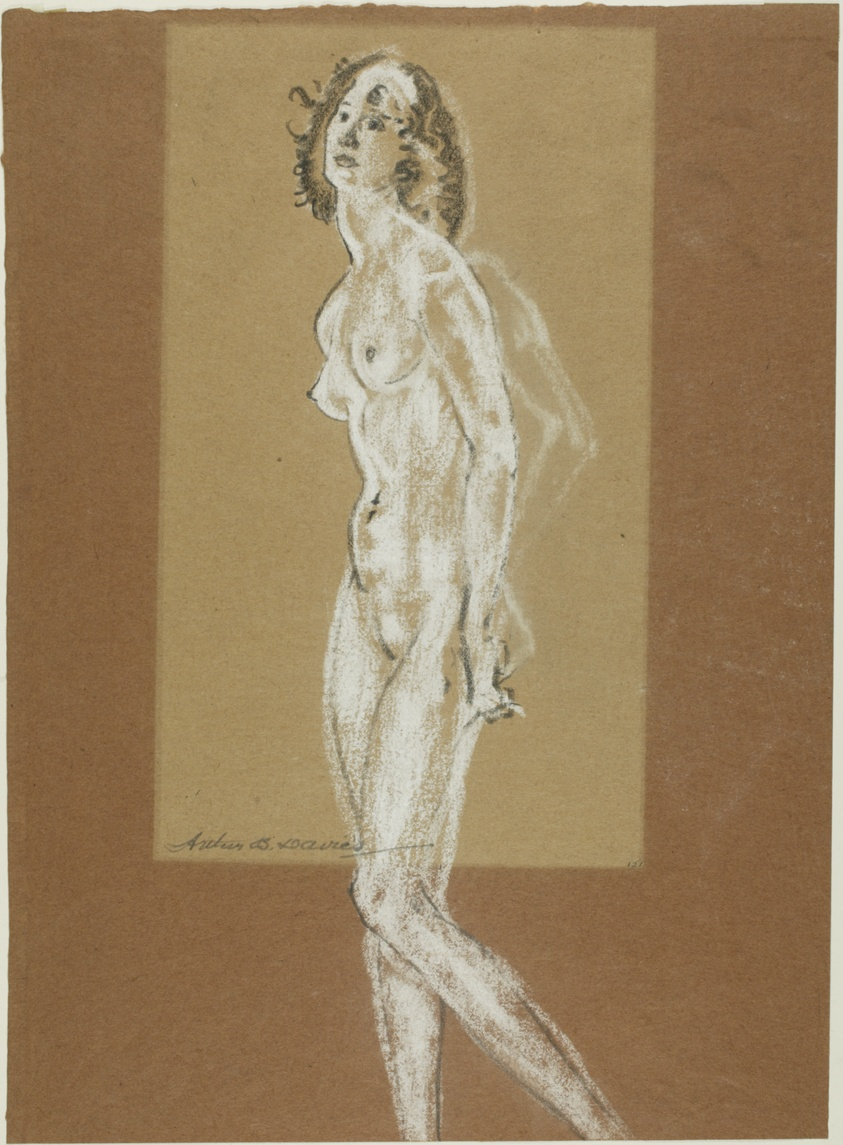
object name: Drawing and Watercolor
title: Standing Female Nude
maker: Arthur B. Davies (American, 1862-1928)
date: 1882/93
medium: Black crayon and white chalk on brown laid paper (partially discolored to tan)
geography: United States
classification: chalk; drawings (visual works); prints and drawing